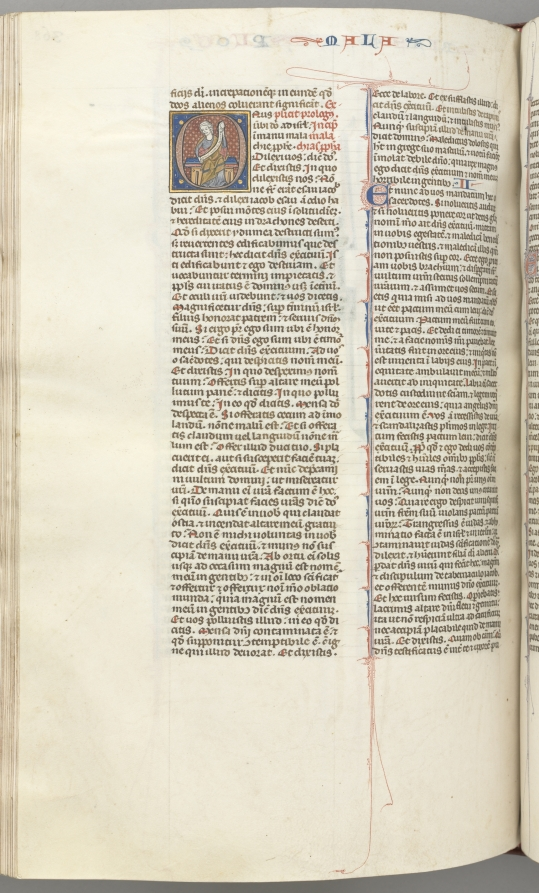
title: Fol. 368v, Malachi, historiated initial O, Malachi seated with a scroll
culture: Southern France, Toulouse(?), 13th century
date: c. 1275–1300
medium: ink, tempera and gold on vellum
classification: Bound Volume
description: Biblical manuscripts were highly prized and important possessions of churches, monasteries, cathedral schools, and universities throughout medieval Europe. The biblical texts were known as the vulgate, the translations made by Saint Jerome in the fourth century from Hebrew and Greek into Latin, which became the definitive and official Latin version of the Roman Church. In the 13th century, the bible was, for the first time, produced as a single volume with an officially sanctioned sequence to its books and chapters as illustrated by this example. The very extensive decoration of this bible is arranged hierarchically to indicate the relative importance of the various texts so that full or almost full-page initials mark the openings of the first prologue, Genesis, and the first Gospel; historiated initials mark the beginning of each book and illuminated initials mark the Prologues.